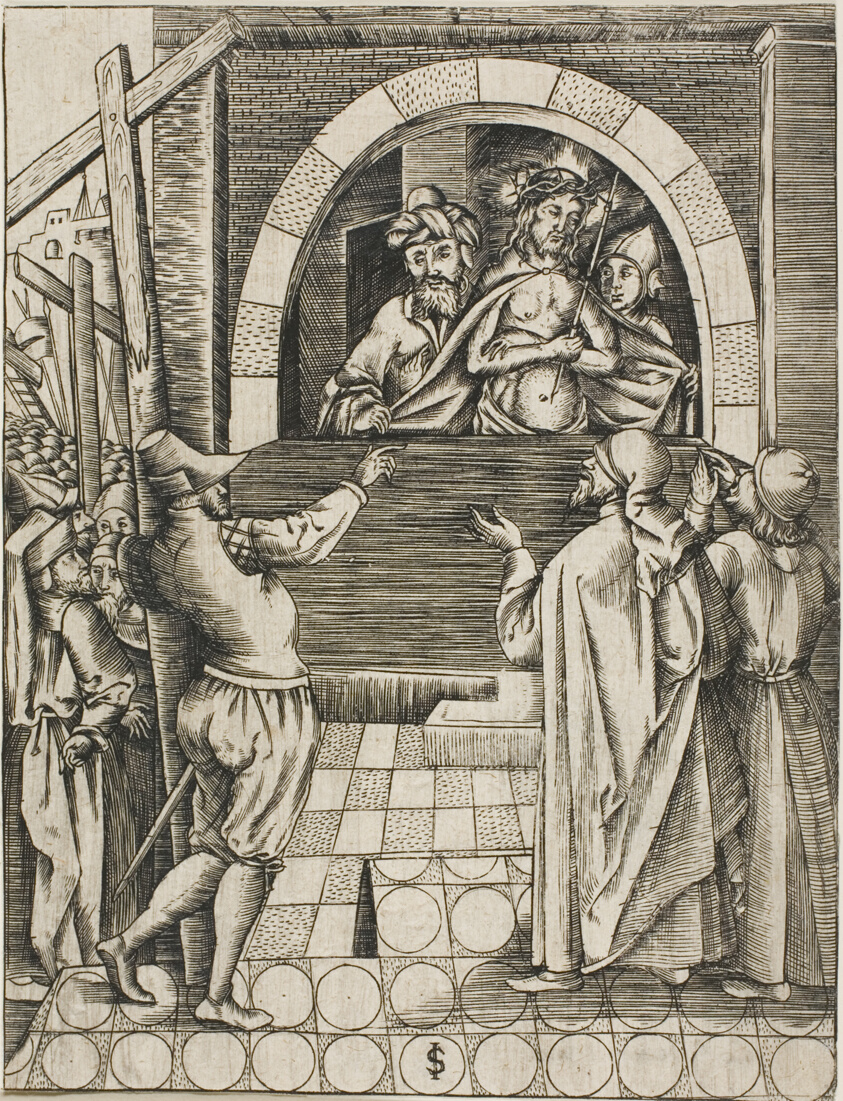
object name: Print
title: Ecce Homo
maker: Master IS (German, active c. 1534); after Albrecht Dürer (German, 1471-1528)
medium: Engraving on ivory laid paper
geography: Germany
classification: engraving; print; prints and drawing; paper